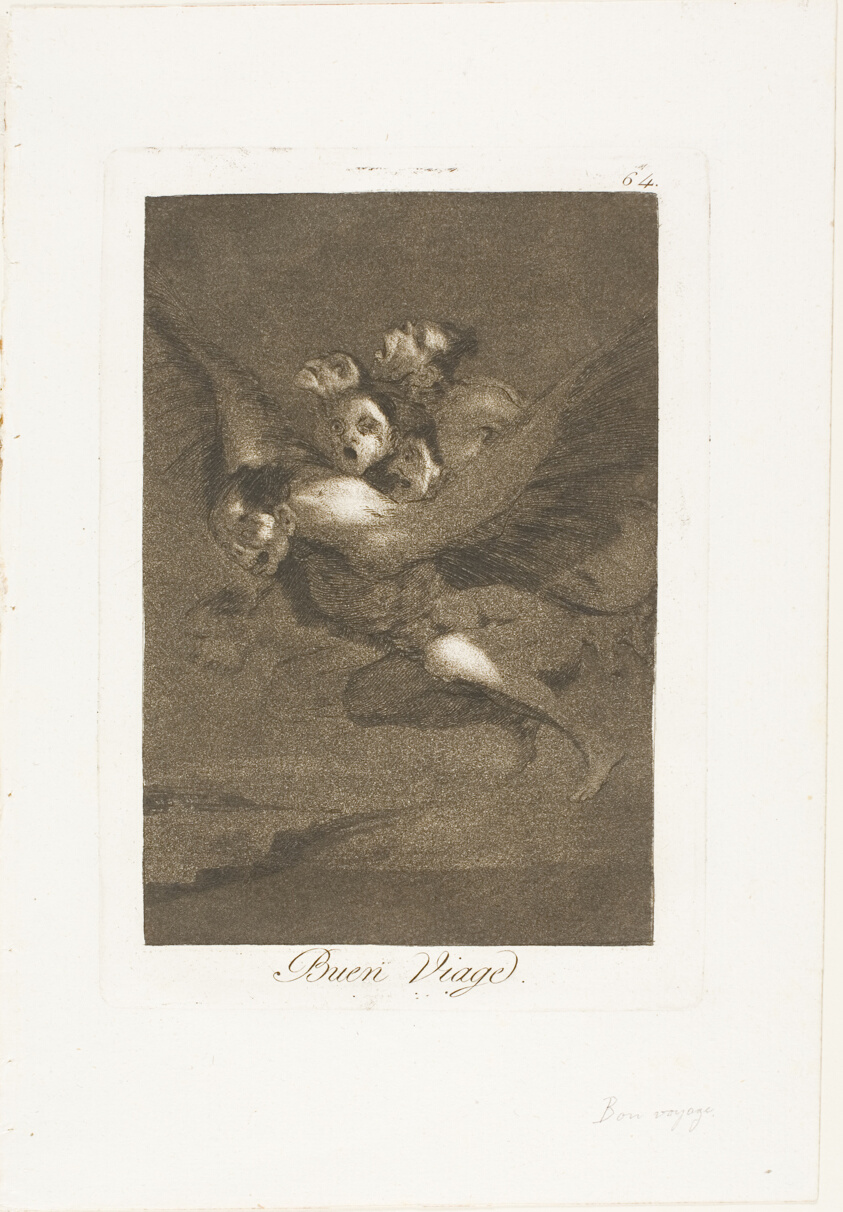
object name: Print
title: Bon voyage, plate 64 from Los Caprichos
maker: Francisco José de Goya y Lucientes (Spanish, 1746-1828)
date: 1797/99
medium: Etching and aquatint on ivory laid paper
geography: Spain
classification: etching; print; prints and drawing